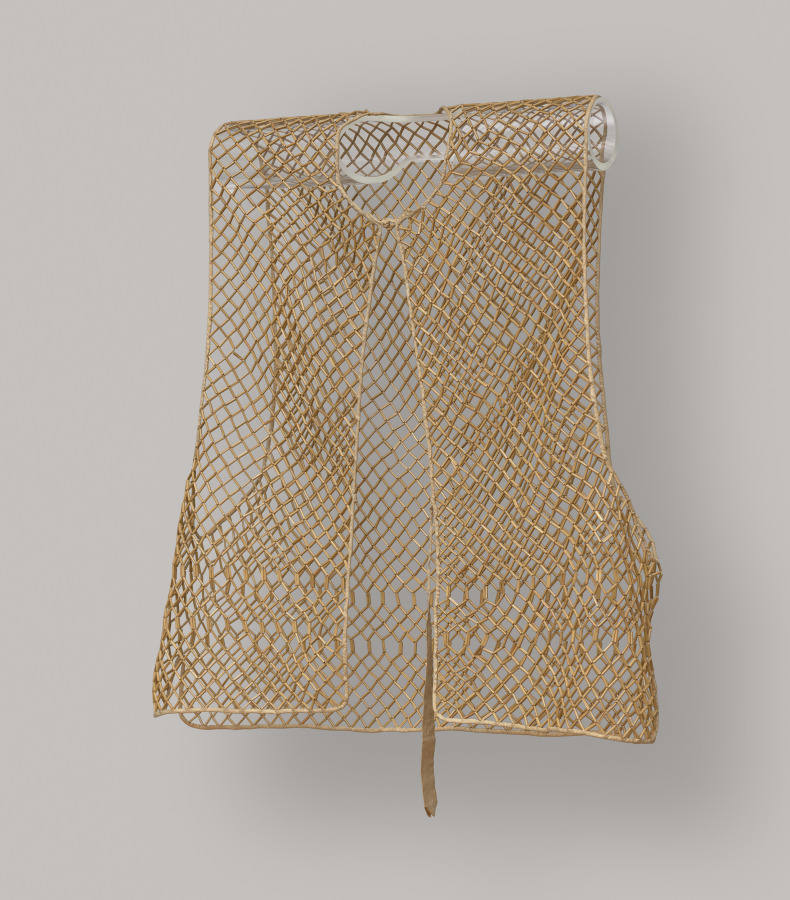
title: Sleeveless garment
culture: China, Qing dynasty (1644-1911)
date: 1800s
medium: Bamboo beads strung together in diamond and hexagon patterns; edges in plain weave cotton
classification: Garment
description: This loose-fitting bamboo vest is a summer undershirt, made of an estimated 3,490 fine bamboo tubes. The overall structure of the vest is held together with cotton thread. Such vests were worn under an outer garment to allow the air to circulate and protect the outer garment from soilage, especially in the hot and humid climate of southern China. Textual evidence indicates that officials during the 1500s in Jiangnan wore bamboo vests from Jiangsu province, one of the production centers.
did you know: According to Nhat Quyen Nguyen, CMA graduate intern in textile conservation, this garment is made of at least 3,490 cut bamboo pieces.